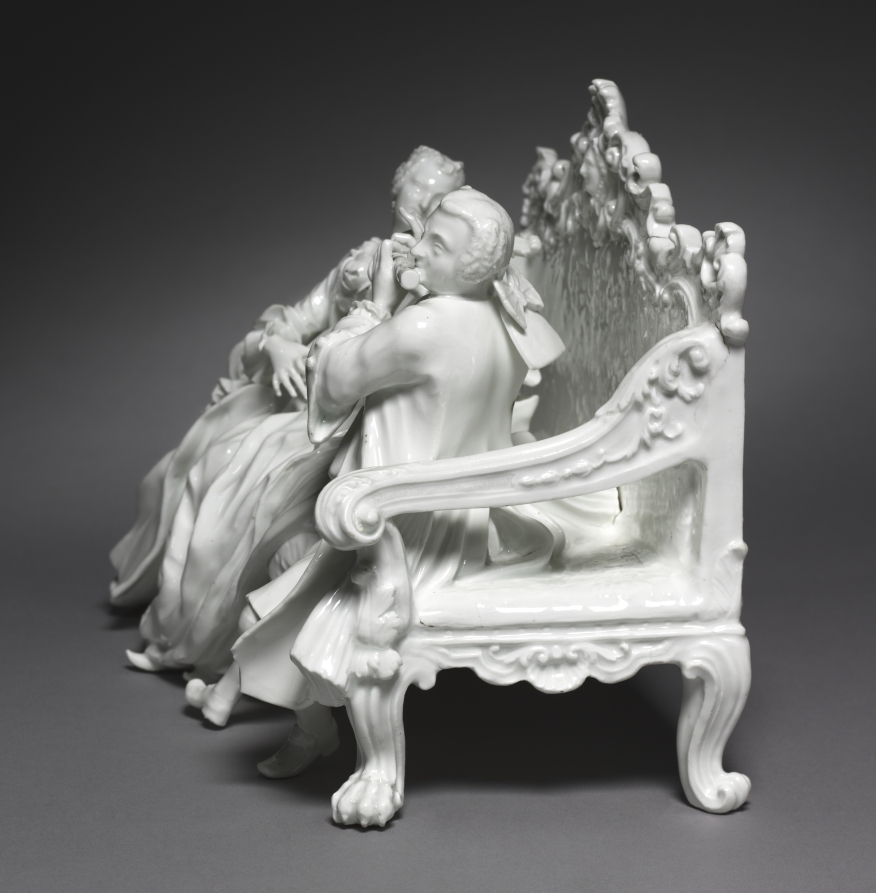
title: Figural Group: Musicians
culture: Germany, 18th century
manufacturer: Meissen Porcelain Factory (German, est. c. 1710)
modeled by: Johann Joachim Kändler (German, 1706–1768)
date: c. 1737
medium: porcelain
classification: Ceramic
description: An elegantly dressed couple accompany one another in a duet while seated on a tall-backed settee in this German porcelain figurine. The woman is likely playing a lute, an early form of the guitar, while the gentleman joins in with a wooden flute. Their music-making reflects their courtship and intimacy—a typical symbolic gesture rendered in such figural ceramic sculptures.